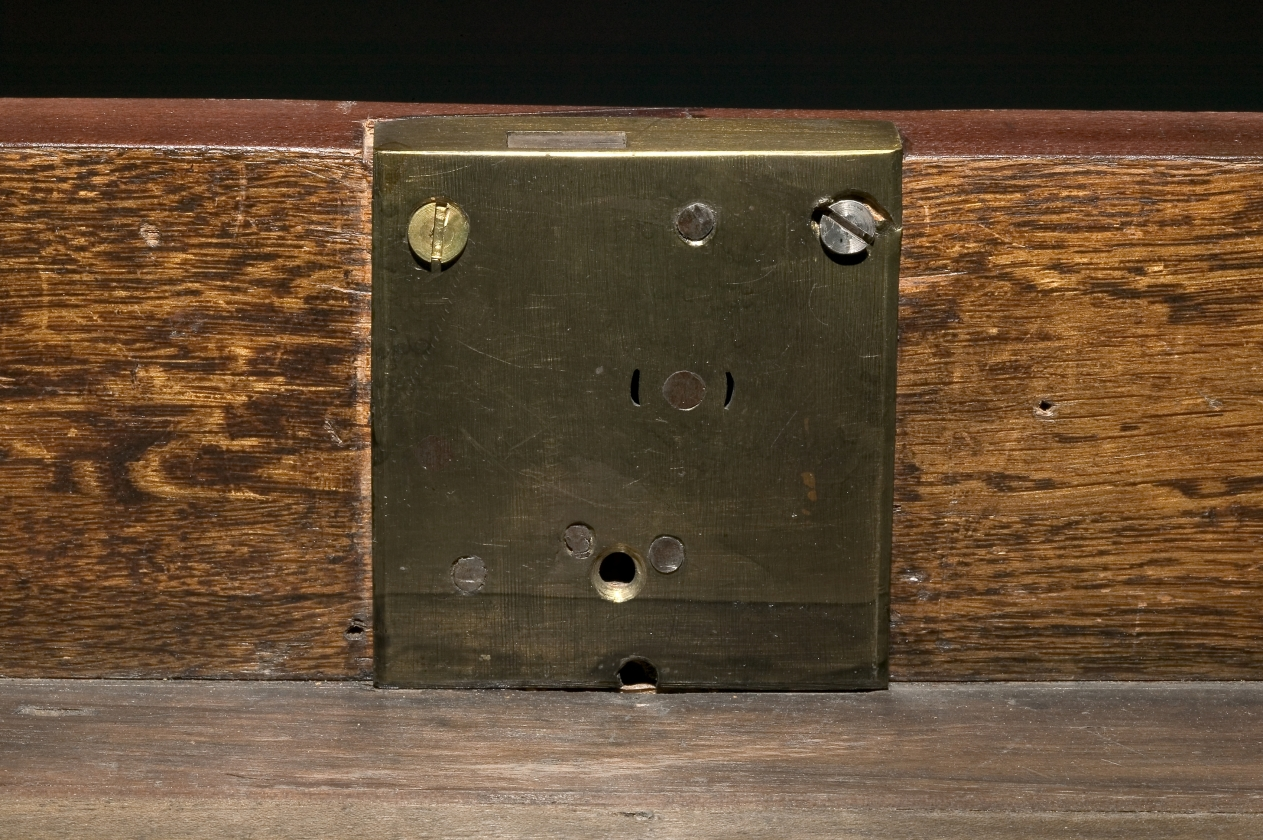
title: Table Desk (Bureau Plat)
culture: France, 18th century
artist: Bernard II van Riesen Burgh (Dutch, 1766)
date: c. 1750– 1760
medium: wood marquetry with gilt bronze mounts, leather top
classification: Furniture and woodwork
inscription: signed three times on bottom edge of apron: B. V. R. B.